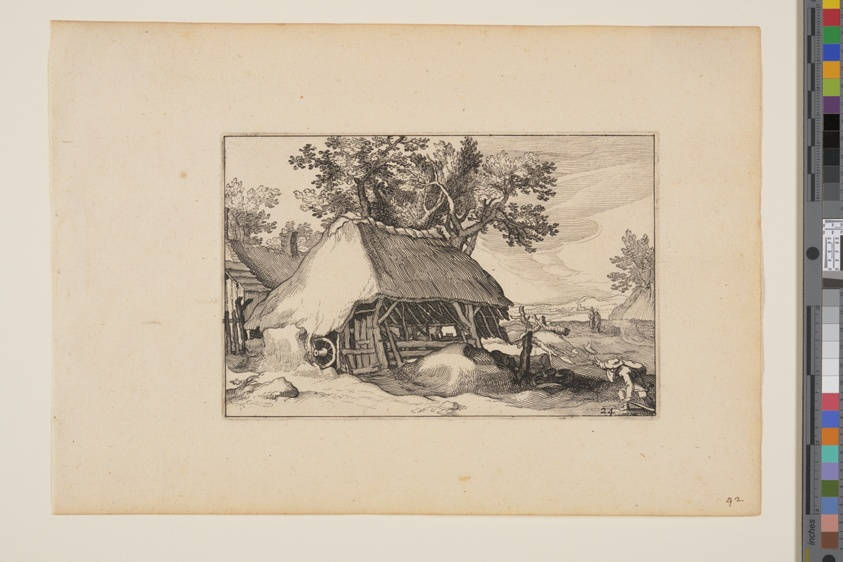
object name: Print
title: A Barn, from Landscapes (Verscheyden aerdige Lanthuysen...)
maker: Claes Jansz. Visscher (Netherlandish, c. 1550–c. 1612); after Abraham Bloemaert (Dutch, 1566–1651)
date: 1620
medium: Etching on ivory laid paper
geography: Netherlands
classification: print; paper; prints and drawing; etching